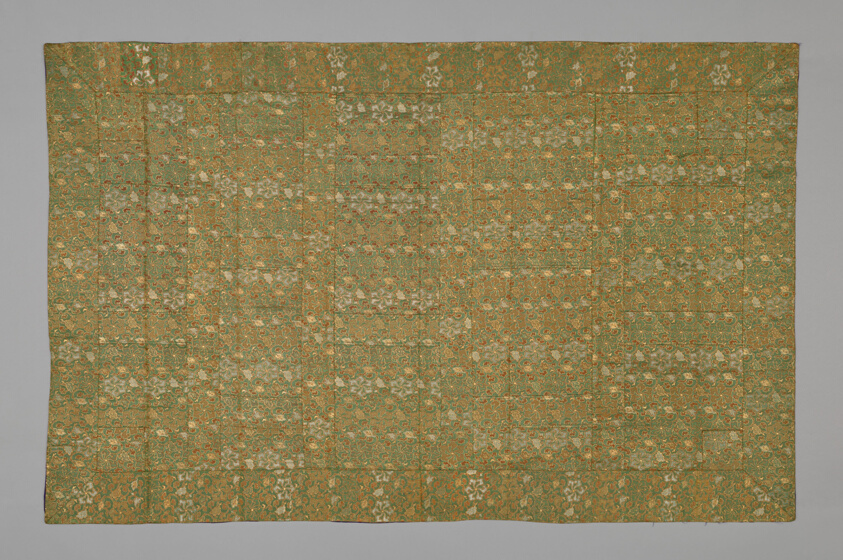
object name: Textile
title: Kesa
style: meiji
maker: Japan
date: Meiji period (1868–1912), late 19th century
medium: Silk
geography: Japan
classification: textile; weaving; liturgical - buddhist